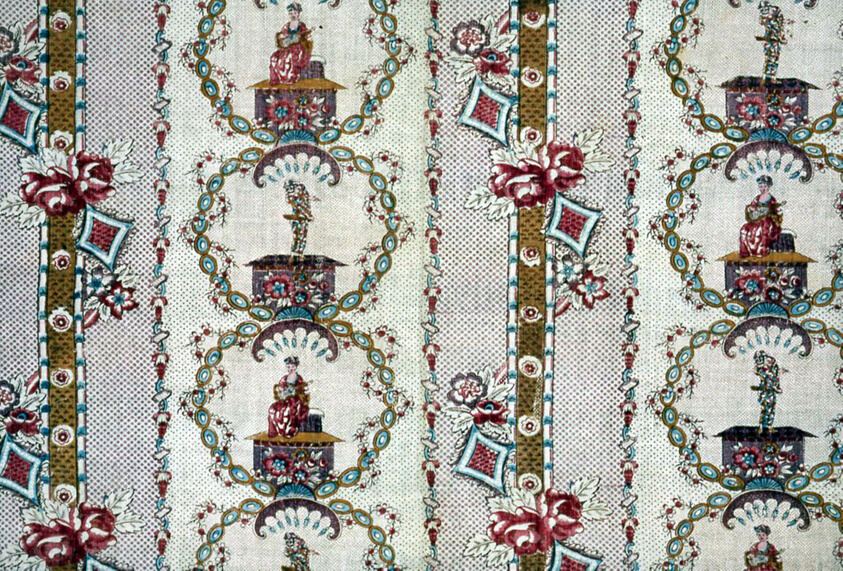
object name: Textile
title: Domino (Furnishing Fabric)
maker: France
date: 1780/1800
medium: Linen, plain weave; block printed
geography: France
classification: textile; weaving - printed; furnishing textile